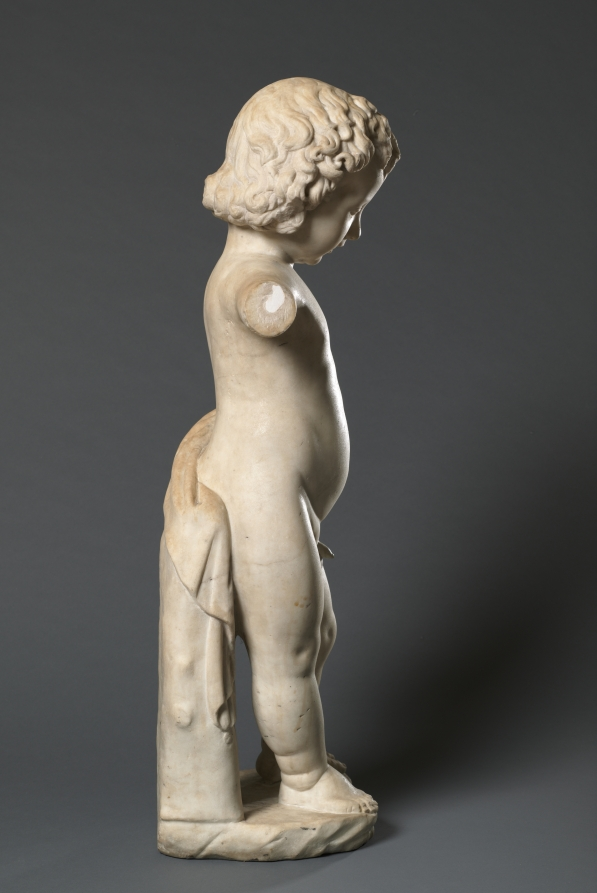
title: Christ Child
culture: Italy, Florence, 15th century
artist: attributed to Michele (di Luca) Marini (Italian)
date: c. 1490–1500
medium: marble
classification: Sculpture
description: This sculpture is an enlarged version of Desiderio da Settignano's figure of about 1460 at the top of his tabernacle in the Church of San Lorenzo in Florence. There are many replicas of Desiderio's work. This example is an especially fine one, undoubtedly intended for the interior of a church.